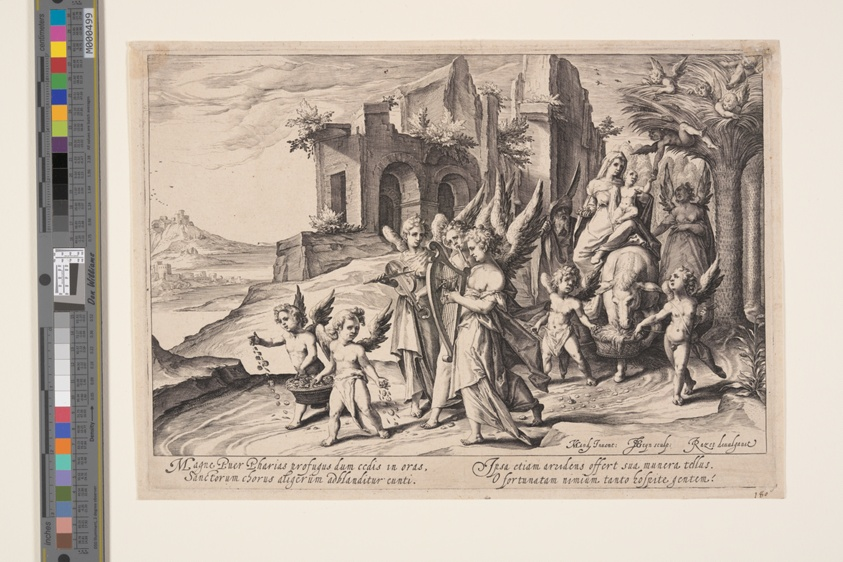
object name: Print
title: Return from the Flight into Egypt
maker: Jacques de Gheyn II (Dutch, 1565–1629)'; after Karel van Mander (Dutch, 1548–1606)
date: c. 1592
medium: Engraving on laid paper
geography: Netherlands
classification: engraving; paper; print; prints and drawing